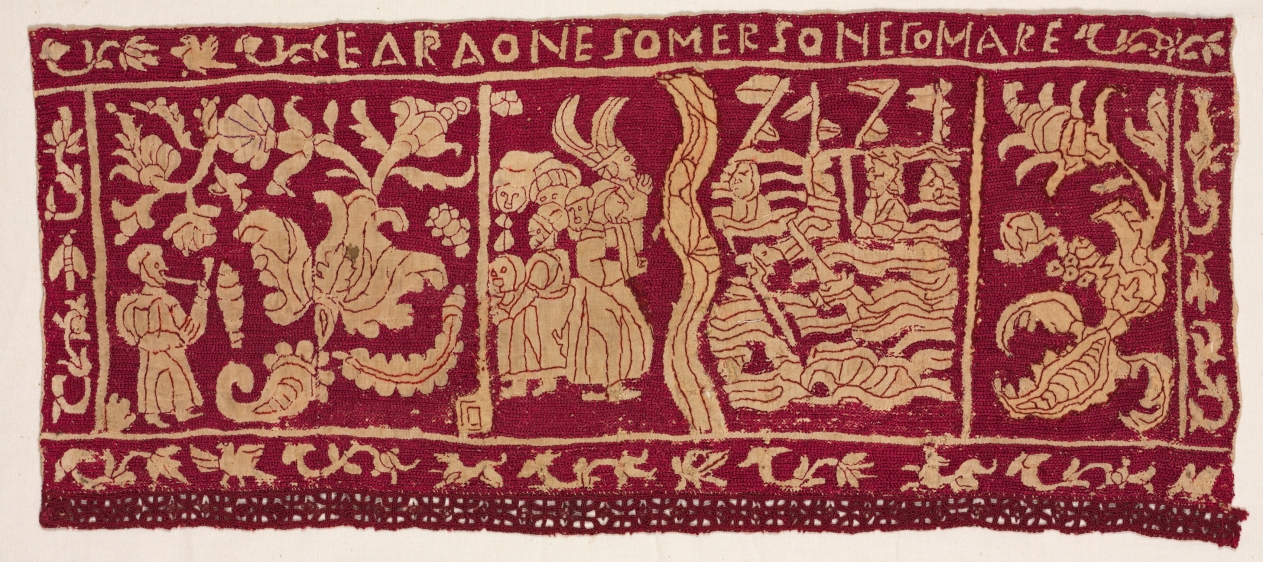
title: Embroidered Border: The Pharaoh Being Submerged in the Sea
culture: Italy, 16th-17th century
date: 1500s-1600s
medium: Plain weave linen; embroidery in silk; attached border of needle lace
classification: Embroidery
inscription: Embroidered lettering in upper margin: EARAONESOMERSONECOMARE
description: The border fragments on the left tell the story of the Israelites baking unleavened bread during the first Passover, after which they were delivered out of captivity in Egypt. In the top panel, bakers mix and knead the dough; the bottom panel shows the bakers standing on a tiled floor while placing the bread into a brick oven. This common household scene would have been familiar to Italian audiences during the Renaissance. Two fragments depict events recorded in the book of Exodus. In the top panel, the pharaoh is shown releasing the Israelites after the last plague (1939.355). In the bottom panel, he changes his mind and pursues them across the parted Red Sea, only to be swallowed up after the Israelites safely crossed (1939.352).